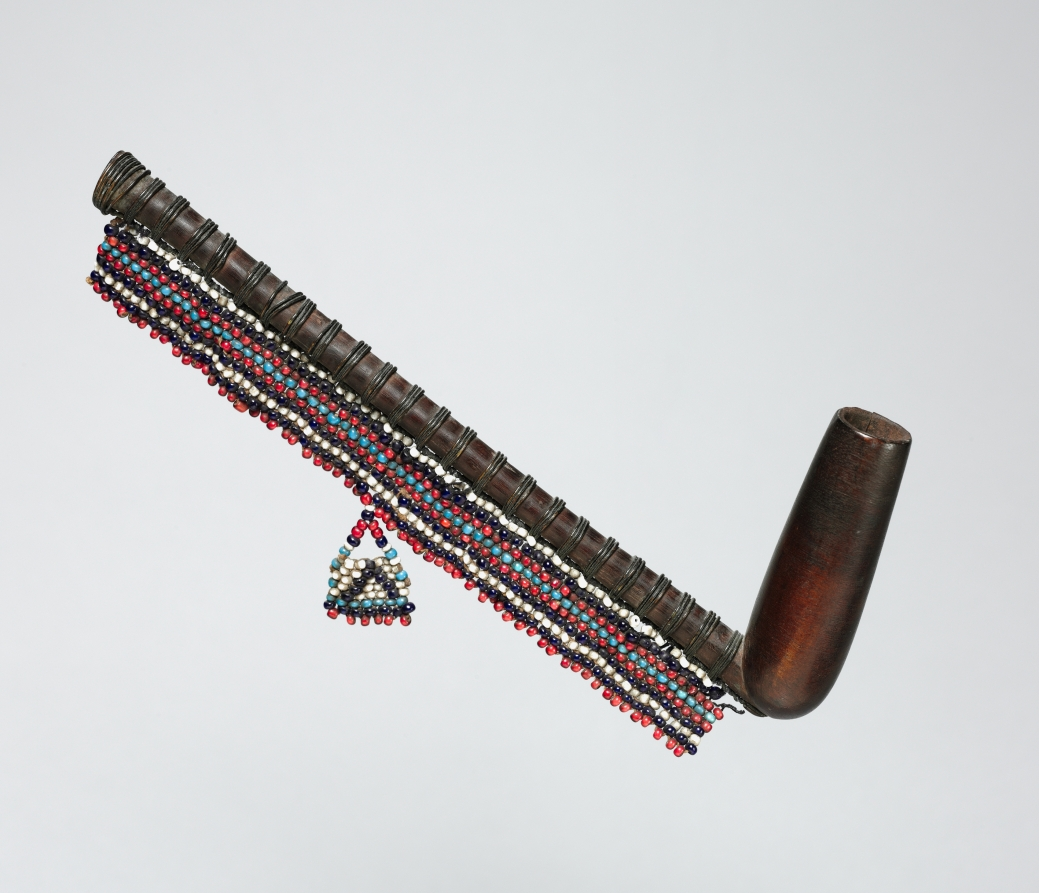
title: Pipe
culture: Africa, Southern Africa, South Africa, Xhosa-style maker(s)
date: 1800s–1900s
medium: Wood, copper, glass beads, sinew, leather, and thread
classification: Implements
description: Mothers often used long-stemmed pipes like this because they helped direct smoke away from the babies they carried on their backs. Carved by men, pipes were used by both men and women. A female maker added beaded fringe using a color scheme typical of Xhosa beadwork. The miniature apron suspended from the fringe suggests a woman’s garment, and thus ownership of this pipe. Social and leisure practices, smoking and snuffing tobacco were also associated with the ancestors and with ideas of fertility and procreation. Inherited between individuals and families, pipes have connected clans and generations and thus linked the worldly present with the ancestral past.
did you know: The basic form of pipes like this one derives from examples made from clay, which the Dutch introduced at the end of the 1500s.